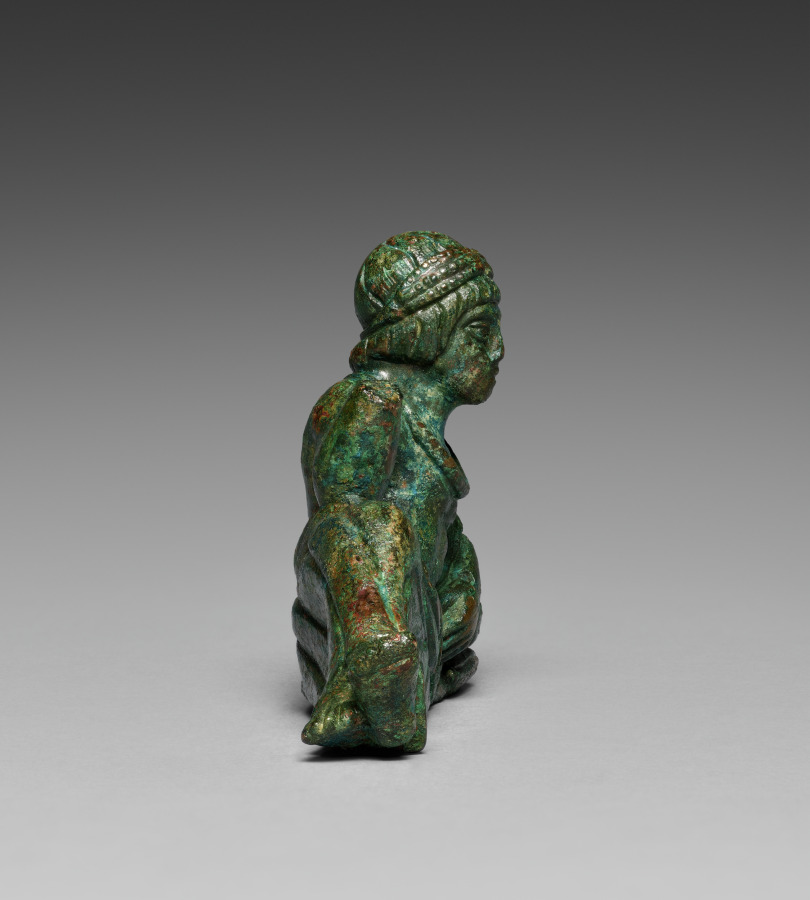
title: Vessel Ornament of Banqueter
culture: Etruscan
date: probably 400–375 BCE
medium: bronze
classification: Sculpture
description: This bronze banqueter figurine was one of six once adorning the rim of a large basin, now lost. Cast in molds with individualized details, most have grooves on their underside to attach to the basin. Minute traces of gilding remain on areas of clothing and skin (mostly visible only under magnification), suggesting that they may have been completely gilded. Two handles in the form of hippocampi, horses with serpentine tails, also belonged to the basin and are now displayed at the Michael C. Carlos Museum at Emory University. The basin may have been used to hold liquid for a banquet, or was perhaps funerary. This reclining bronze figurine’s left arm rests on the drapery covering his shoulder. His right arm is raised and broken at the wrist. Garlands rest on his head and chest. Traces of gilding remain in the garlands and drapery folds. The figurine is very similar to 1987.157, suggesting that he may have held a phiale mesomphalos, a shallow bowl used for wine libations to the gods.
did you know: Representations like this figurine suggest that Etruscan banqueters may have worn garlands made of flowers or leaves.